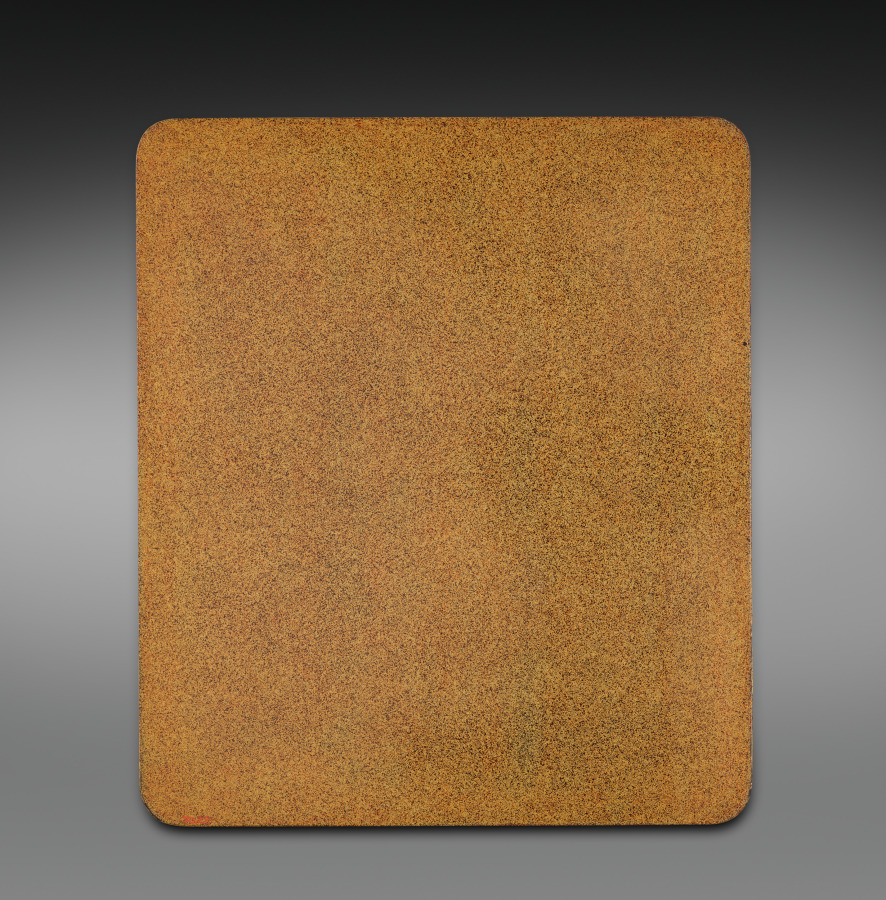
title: Writing Box (Suzuribako) with the “First Song” (Hatsune) Chapter from the Tale of Genji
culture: Japan, Meiji period (1868–1912)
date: early 1900s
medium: Lacquered wood with gold and silver sprinkled powder (maki-e), foil application (kirikane), and metal inlay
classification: Lacquer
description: The design of this box was inspired by an object in the 1639 lacquer wedding set of Chiyohime, the daughter of the shogun (ruler). Information about the set became available in the Meiji period, leading some lacquer artists to emulate its designs. This box features a scene from the chapter “First Song” (Hatsune) of the Tale of Genji, in which Prince Genji and his love Murasaki enjoy her garden. It incorporates the written characters for “first” (初, hatsu) and “sound” (音, ne), indicating the first song of the warbler in spring, associated with the new year—the water dropper for mixing the ink is in the shape of this bird.